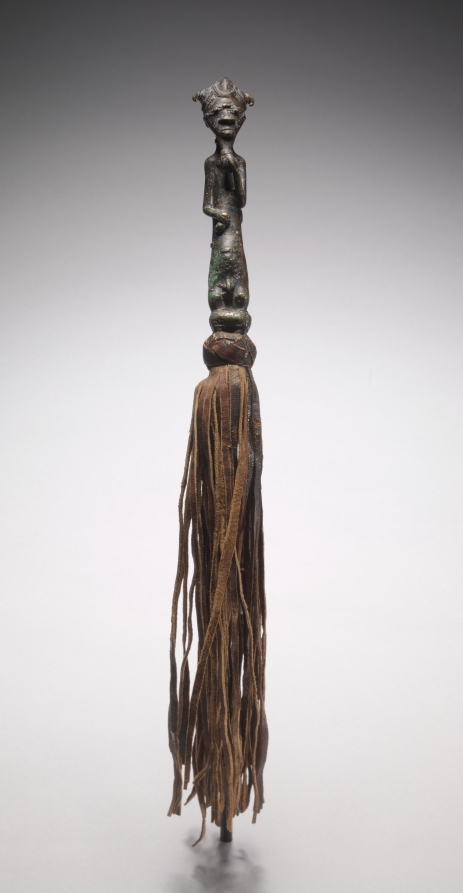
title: Flywhisk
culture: Africa, West Africa, Côte d'Ivoire, Baule-style maker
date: c. 1850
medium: Copper alloy and leather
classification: Sculpture